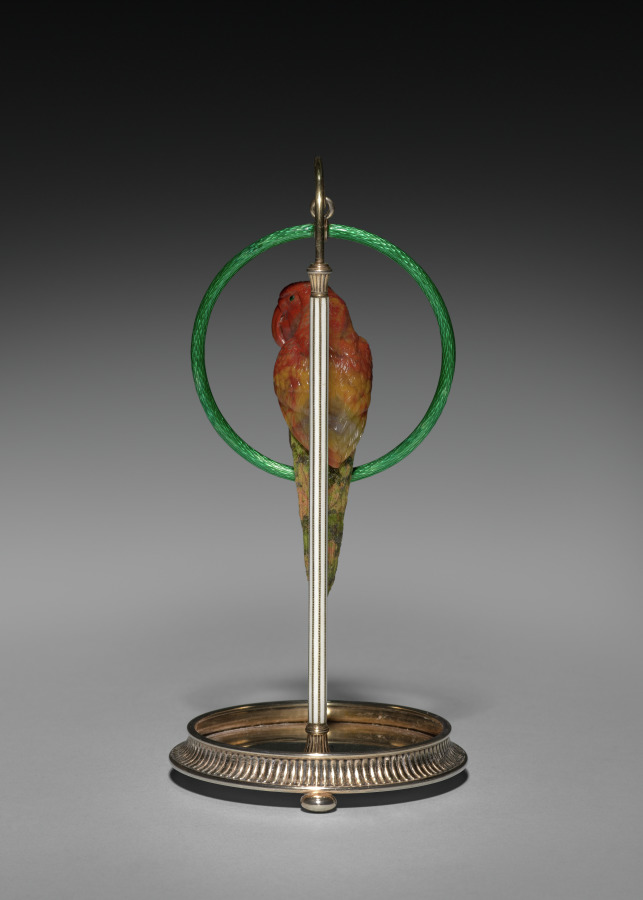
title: Parrot on a Perch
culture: Russia, St. Petersburg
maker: House of Fabergé (Russian, 1842–1918)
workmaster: Mikhail Evlampievich Perkhin (Russian, 1860–1903)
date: 1896–1903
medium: silver, enamel, jasper, agate, emeralds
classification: Miscellaneous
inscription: 88, Kokoshnik, tester's initials (in Cyrillic) [assay mark for St. Petersburg, 1896-1908]; initials of workmaster Mikhail Perkhin (in Cyrillic); Fabergé (in Cyrillic); 6817 scratched.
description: In creating luxurious accessories for a desk or tabletop, Fabergé often used native hardstones such as multicolored agate and jasper, green nephrite, pink rhodonite, and rock crystal found in the Ural Mountains of western Russia. By paying careful attention to the unique colors and textures of the stones, Fabergé and his craftsmen brought them to life, turning milky agate into a begging poodle or green and black jasper into this parrot sitting on a perch. The use of native materials also promoted Russian nationalism, which appealed greatly to the tsar and his family.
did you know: Tsar Nicholas and his cousins in the British royal family kept parrots and parakeets throughout their many palaces.